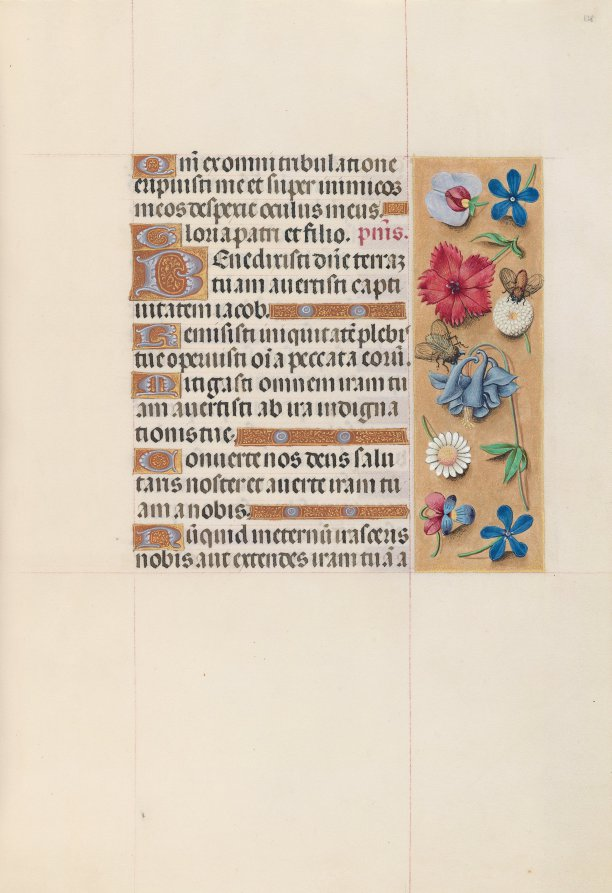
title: Hours of Queen Isabella the Catholic, Queen of Spain: Fol. 128r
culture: Flanders, Ghent and Bruges, late 15th century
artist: Master of the First Prayerbook of Maximillian (Flemish, c. 1444–1519)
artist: and Associates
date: c. 1500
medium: ink, tempera, and gold on vellum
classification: Bound Volume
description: This manuscript was illuminated by a circle of at least five highly organized manuscript painters active in the Flemish cities of Ghent and Bruges. The principal illuminator was Alexander Bening, who painted the majority of the book's miniatures. Manuscripts produced by this circle of artists are renowned for the decoration of their borders, which typically feature a rich variety of realistically-painted flowers, birds, and butterflies. This prayer book, called a book of hours, was intended not for a cleric, but for the private devotions of a lay person-in this case, Isabella the Catholic, Queen of Spain (1451-1504). Isabella's coat of arms embellishes the book's frontispiece. It is unlikely that the book was commissioned by the Queen herself; rather, she probably received it as a diplomatic gift from someone courting her patronage, perhaps Cardinal Francisco Jimenez de Cisneros. A Franciscan friar, Jimenez was dependent upon Isabella for his advancement, first to the post of Queen's confessor in 1492, and then to Archbishop of Toledo in 1495.